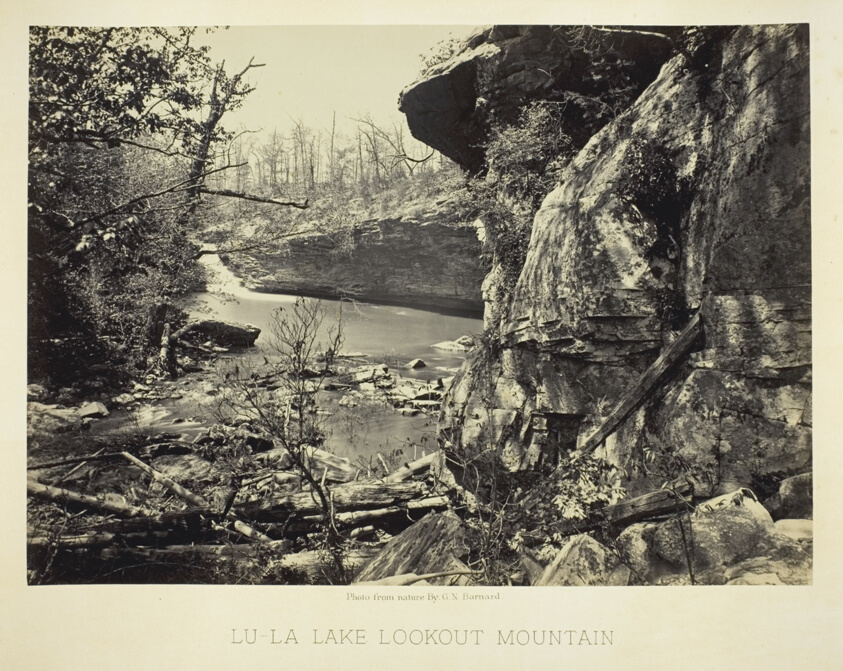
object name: Photograph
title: Lu-La Lake Lookout Mountain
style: 19th century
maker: George N. Barnard (American, 1819–1902)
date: 1864/66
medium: Albumen print, plate 15 from the album "Photographic Views of the Sherman Campaign" (1866)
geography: United States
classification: albumen silver print; photographic process; photography; photograph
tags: Collected by Hugh Edwards, Sherman's Campaign 1866